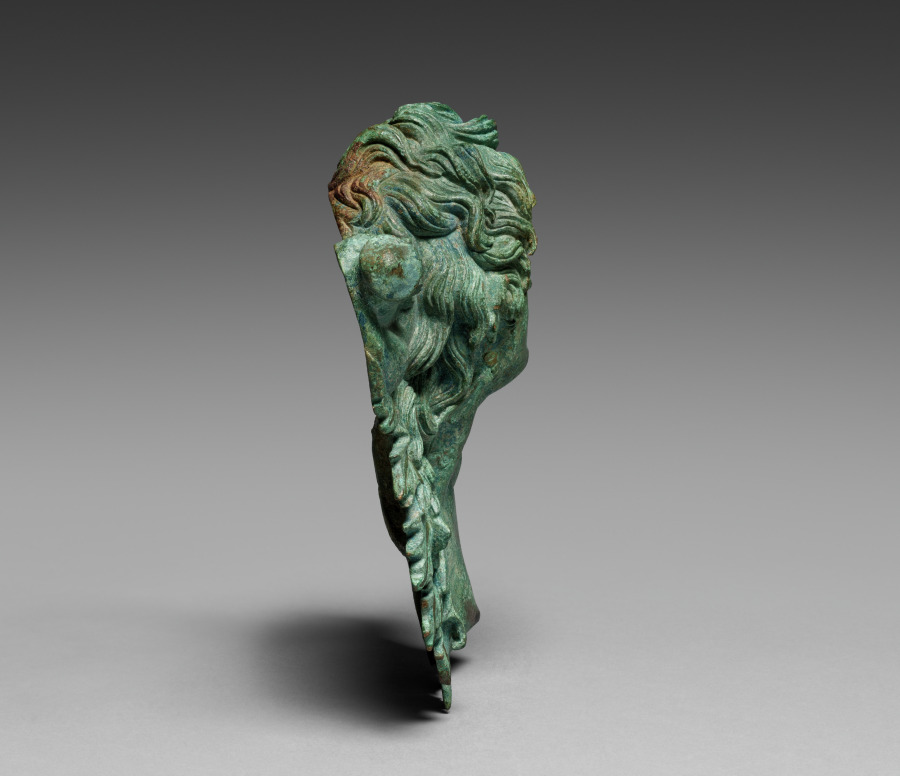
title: Tritoness or Scylla Relief Applique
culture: Greece, Hellenistic period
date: late 200s BCE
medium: bronze with copper inlays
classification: Metalwork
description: The seaweed garment, finned gills, and webbed ears give this female bust appliqué all the hallmarks of an ocean dweller. She may be a Tritoness, a minor goddess of the sea and the female counterpart to the more common Triton. However, her intense gaze and raised arm clutching perhaps the hilt of a sword suggest she may be Scylla, a sea monster that first appears in Homer’s Odyssey. Without the Tritoness’s fishtail or Scylla’s lower body made of dogs’ heads, it is difficult to differentiate. Certain features are highlighted with a copper inlay such as the lips, eyes, and gills.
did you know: Mythological sea creatures became popular metal vessel decorations around the 2nd-century BCE.